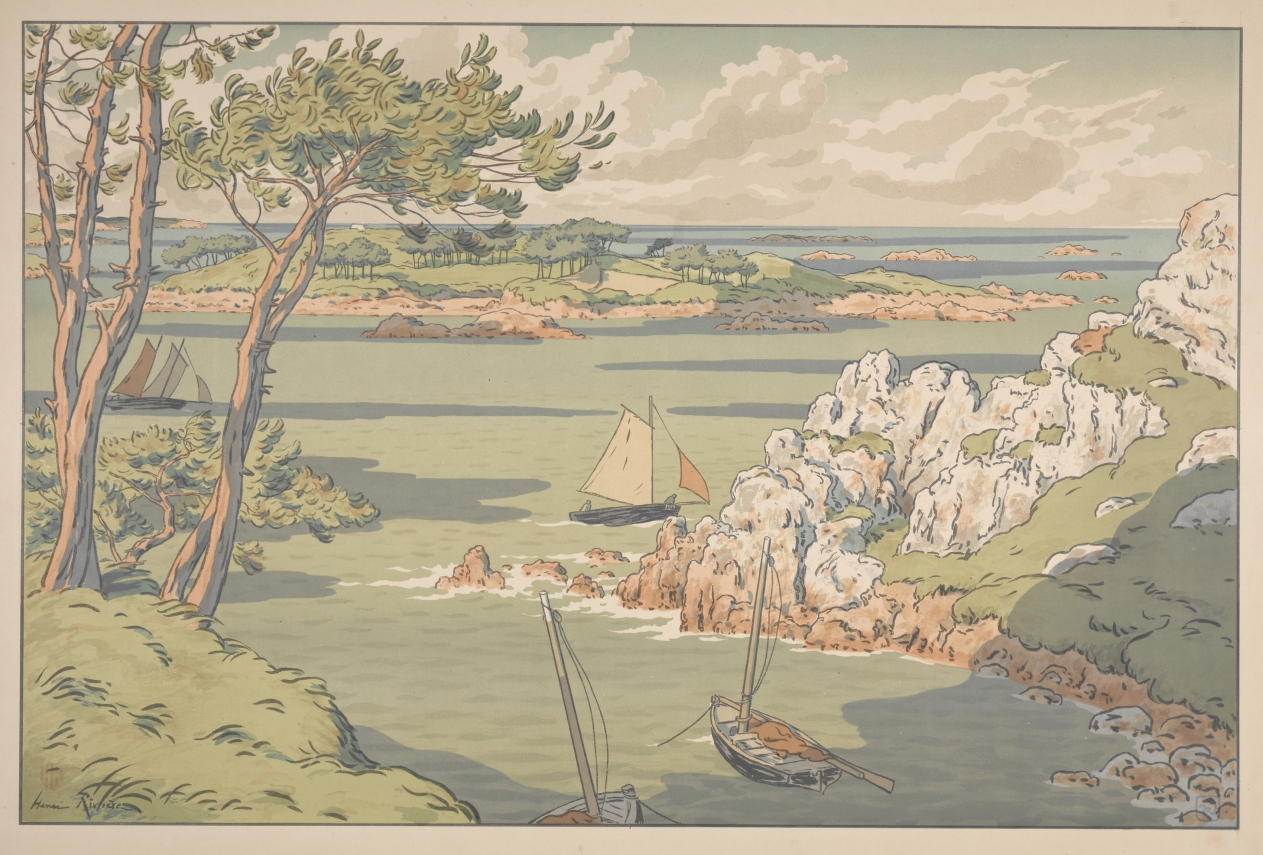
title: Aspects of Nature: The Island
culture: France, 19th century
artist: Henri Rivière (French, 1864–1951)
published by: Printed by Verneau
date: 1898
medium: color lithograph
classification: Print